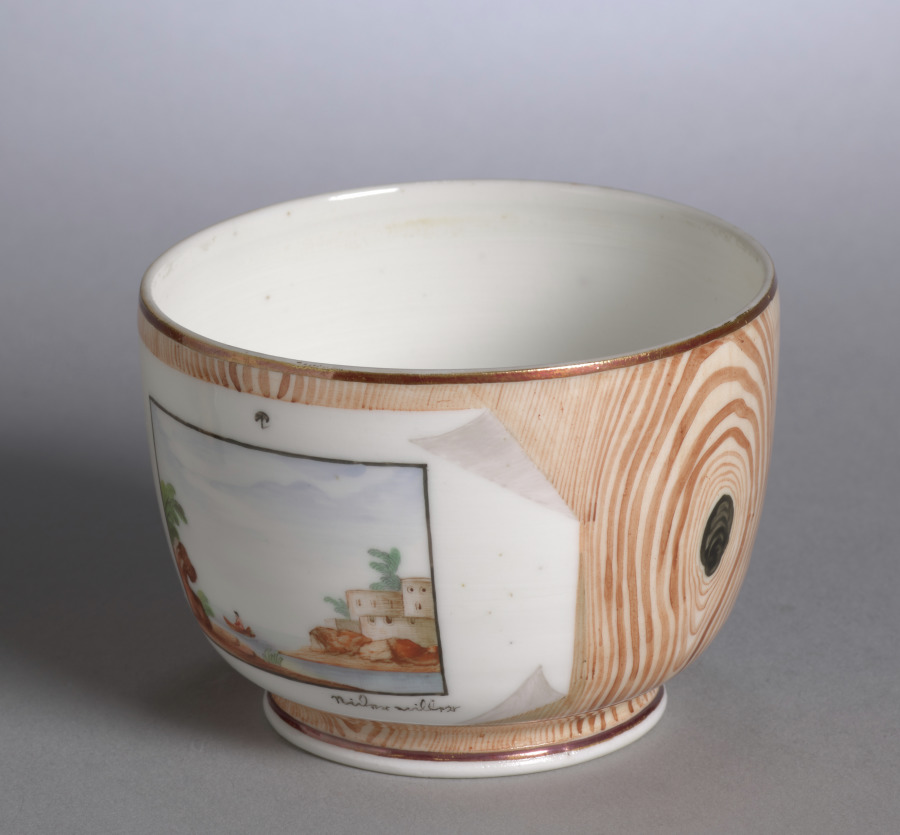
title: Bowl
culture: France, 18th century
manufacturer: Niderviller Factory (French)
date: c. 1780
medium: porcelain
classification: Ceramic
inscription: inscribed at lower right corner of two trompe l'oeil prints: Niderviller.